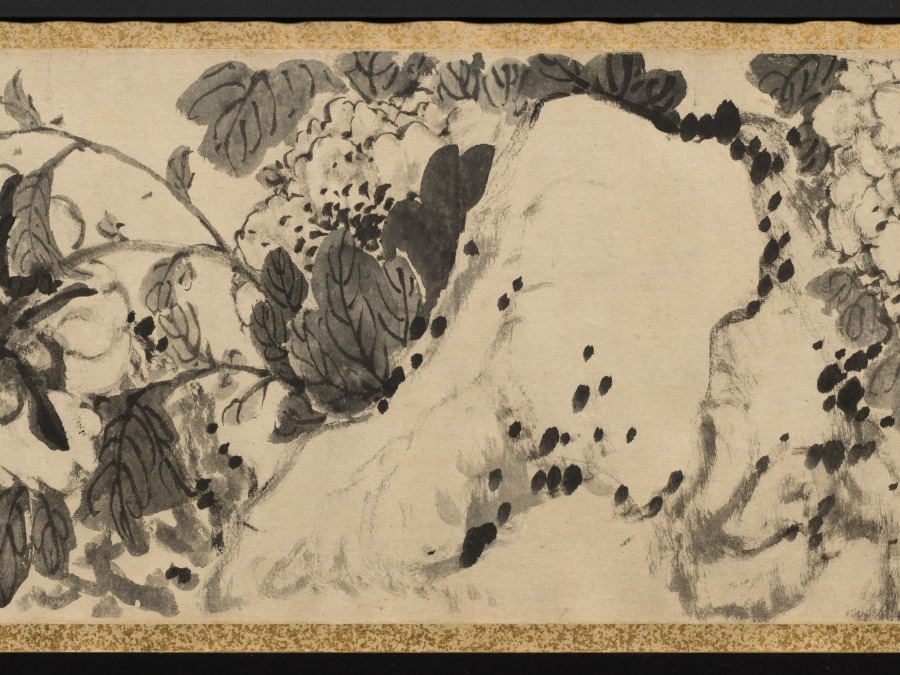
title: Plum Blossoms and Peonies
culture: China, Qing dynasty (1644-1911)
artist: Gao Fenghan (Chinese, 1683–1749)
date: 1741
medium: handscroll, ink on paper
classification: Painting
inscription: Artist's 2 inscriptions and 9 seals (the painting of Peonies with the artist's colophon and the colophon by Hou Chia-fan are on a single sheet of paper). Artist's inscription and 2 seals (Plum Blossoms): [seal] Ts'ai-yün. After finishing writing my colophon, I unrolled the painting to take another look, and it now seems that the composition here should have moved to the later part of the scroll. If that is the case, then the "Cool Beauty" [prunus] of the Solitary Hill is after all unable to take precedence over the "King of Flowers" [peony]. A laugh. Lao-fou inscribed. [seal] Feng-han. Artist's colophon (Plum Blossoms): [3 seals] Tun; Yen-yün-kung-yang, Hou-shang-tso-sheng. A few days after I painted this scroll for Shui- hsien [Yüeh Meng-yüan], the plum blossoms were in full bloom at his residence. He invited me over to enjoy them together for a long while, and I composed two additional poems and wrote them down here for his criticism. [Poems on the colophon are not translated.] First month, twenty-first day, your junior, Kao Feng-han of Nan-fou drafted this with the left hand. [seal] Feng-han. Artist's inscription and 4 seals (Peonies): Brushed with the left hand in the hsin-yu year [1741]. [seal] Yu-hsi. [3 seals at end of painting] Hou-shang-tso-sheng; Yen-yün-kung-yang; Shih-tsao-wu. Artist's colophon and seal (Peonies): The imperial concubine from the Yang family loved to dress in red, And from the emperor won the title of Hai-t'ang. But ever since she became the new dream of the moon palace, She changed into rainbow colors, while learning to dance. After I wrote the poem on Looking for Plum Blossoms in the Teng-wei Mountains, I attached to it a few branches of prunus, some bamboo tips and a piece of rock, with a scattering of green [moss] here and there to fill up the scroll. Unexpectedly, my playful fascination [with these subjects] was still not quite satisfied, so I made up these amorous ideas and romantic images [of the peony], to follow the footsteps of the fair lady of the Ku-hsieh Mountain [prunus]. Furthermore, I picked out one poem to be my vanguard. Perhaps such luminosity of wealth and power will be enough to overwhelm the poor fellows, and [they] will not mind the comparatively short length [of paper] assigned to it. Amusingly inscribed. Please correct me again. To Shui-hsien, my learned senior, your junior Han inscribed again. [seal] Tso-hua [left-handed painting]. 1 additional colophon and 5 additional seals: 1 colophon, dated 1742, and 3 seals of Hou Chia-fan (act. ca. 1742); 1 seal of P'u Ch'üan (20th c.?); 1 seal of Li family (dates unknown).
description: One of the so-called Yangzhou Eccentrics (a group of painters who lived in Yangzhou and were known for their unorthodox art and lifestyle), Gao Fenghan depicts China’s two most loved flowers in full bloom—the “cold beauty,” or plum blossom, in the first section, and the “king of flowers,” or peony, in the second section. Painted in 1741, the year when Gao decided to leave the south and return home to Shandong province in eastern China, this work was likely a token of farewell. His casual brushwork may indicate his mental and physical struggle at the time. After having crippled his right hand in 1737, Gao used his left hand to paint and achieved a crudeness and eccentric style unattainable before.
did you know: In East Asian art, peonies traditionally symbolize prosperity and wealth.